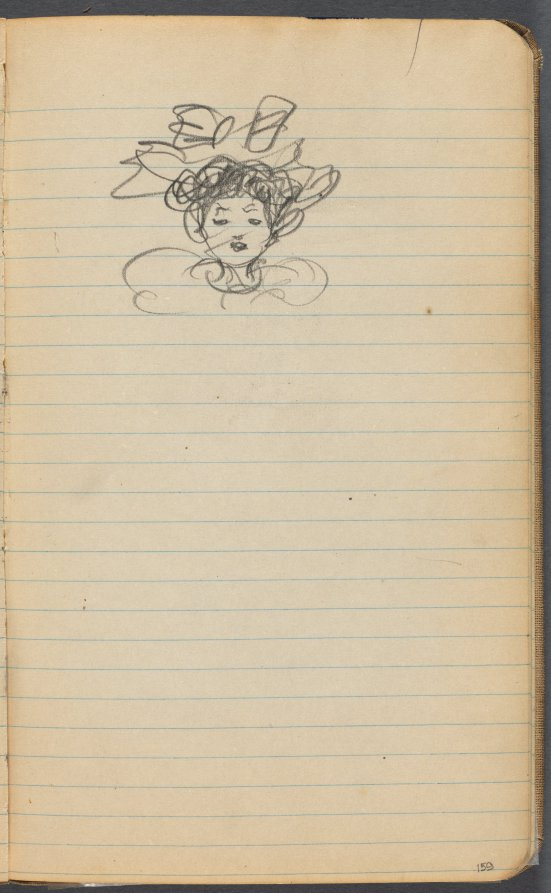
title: Sketchbook, page 159: Head of a Woman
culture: America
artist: Maurice Prendergast (American, born Newfoundland [now Canada], 1858–1924)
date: 1905–10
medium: graphite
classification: Bound Volume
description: This sketchbook contains 69 pages of drawings, a diary largely devoted to the state of the artist's health, and a three-page discourse on the nature of genius and ideas.